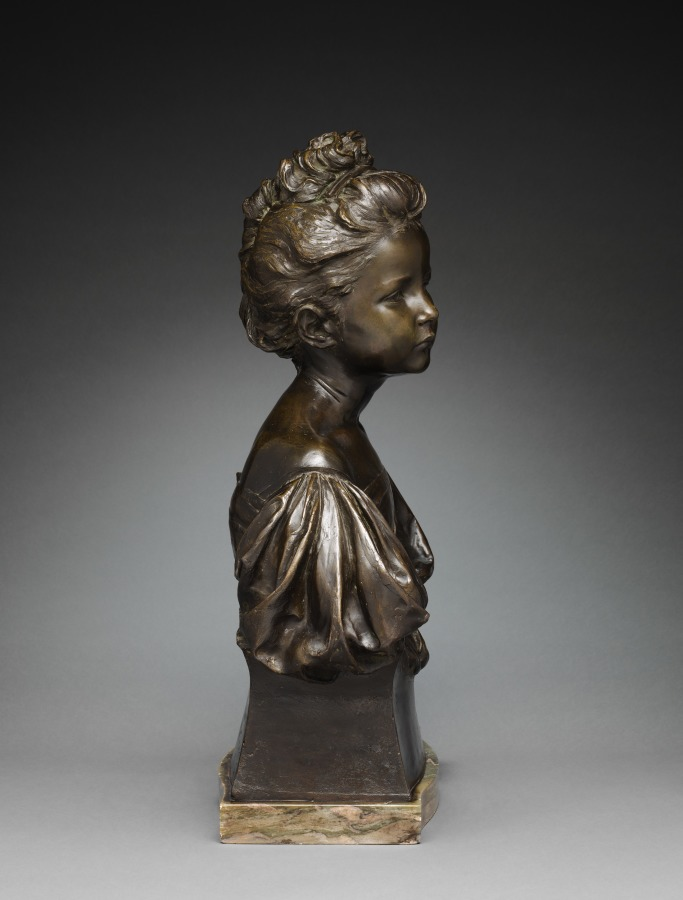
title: The Age of Innocence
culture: England, 19th century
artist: Alfred Drury (British, 1856–1944)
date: 1897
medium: bronze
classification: Sculpture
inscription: signed and dated: A. DRURY 97.